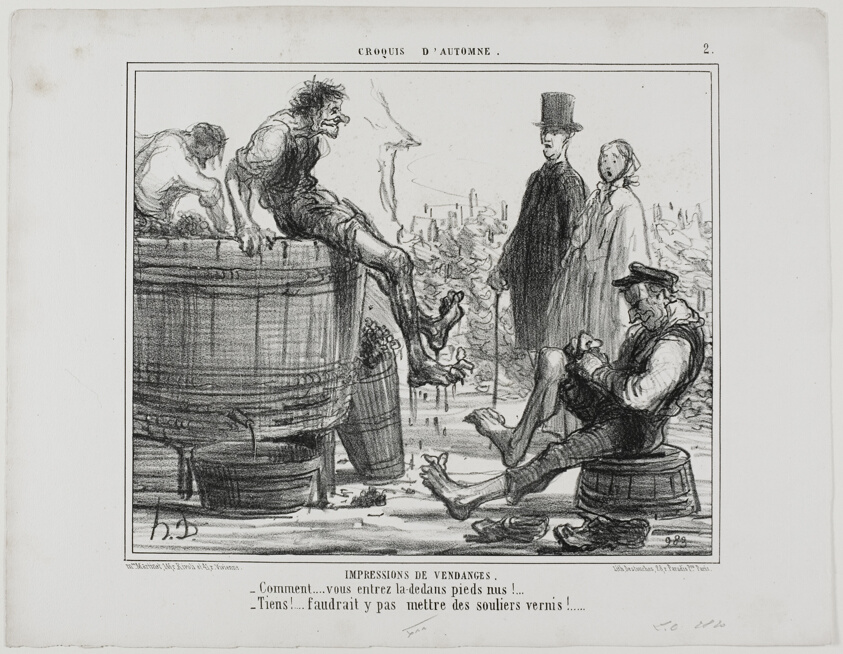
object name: Print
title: Impressions From the Vintage. “- What! You are treading bare-foot? - So what… you wouldn't want us to do it in our dancing shoes!,” plate 2 from Croquis D'automne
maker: Honoré Victorin Daumier; French, 1808-1879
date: 1856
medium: Lithograph in black on ivory wove paper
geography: France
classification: lithograph; print; prints and drawing